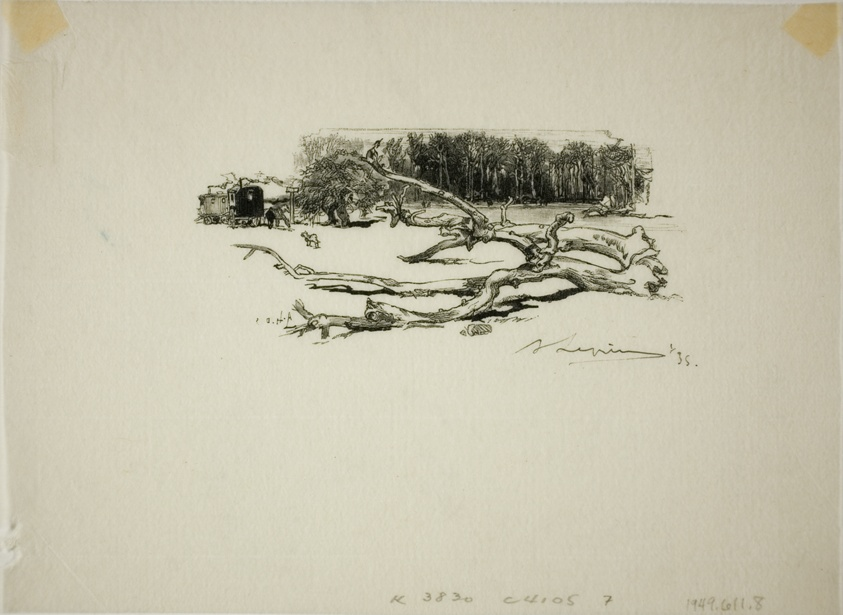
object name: Print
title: Carrefour de l'Epine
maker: Louis Auguste Lepère (French, 1849-1918); published by A. Desmoulins (French, active c. 1908-1910)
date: published 1908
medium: Wood engraving in black on cream laid Japanese paper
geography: France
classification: wood engraving; print; prints and drawing